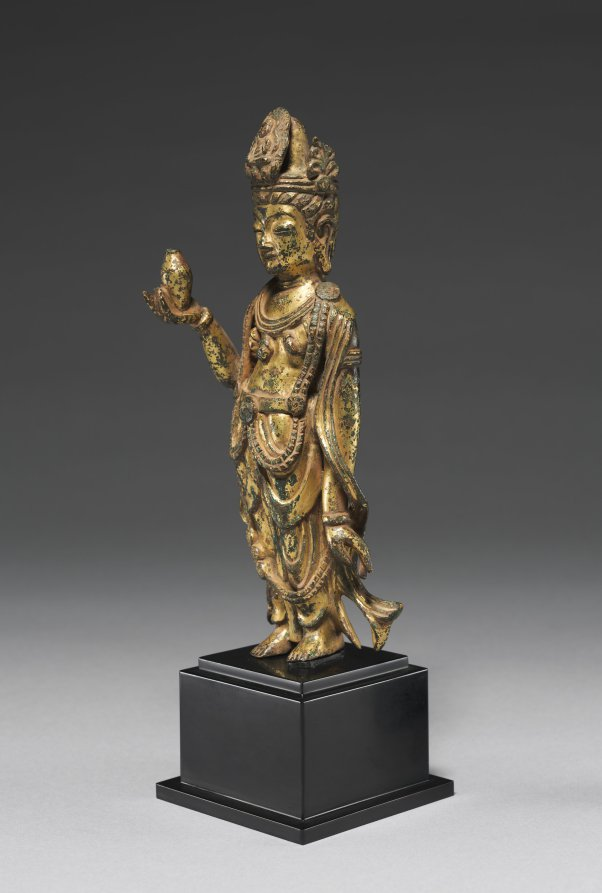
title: Standing Avalokitesvara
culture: Korea, Unified Silla period (668-935)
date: 700s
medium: Gilt-bronze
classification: Sculpture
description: This small gilt-bronze statue represents the Bodhisattva of Compassion (관음보살 in Korean), an enlightened being who helps devotees on their path. It features two prominent attributes: a water sprinkler (kundika in Sanskrit) and a miniature image of Buddha Amitābha in its jeweled crown. Its sweet and gentle smile accentuates this celestial being’s immeasurable compassion for human suffering.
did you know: Created during the Unified Silla period, a high point of the spread of Buddhist teachings, this kind of miniature gilt-bronze statue was often used as a portable object of devotion by traveling Buddhist monks.